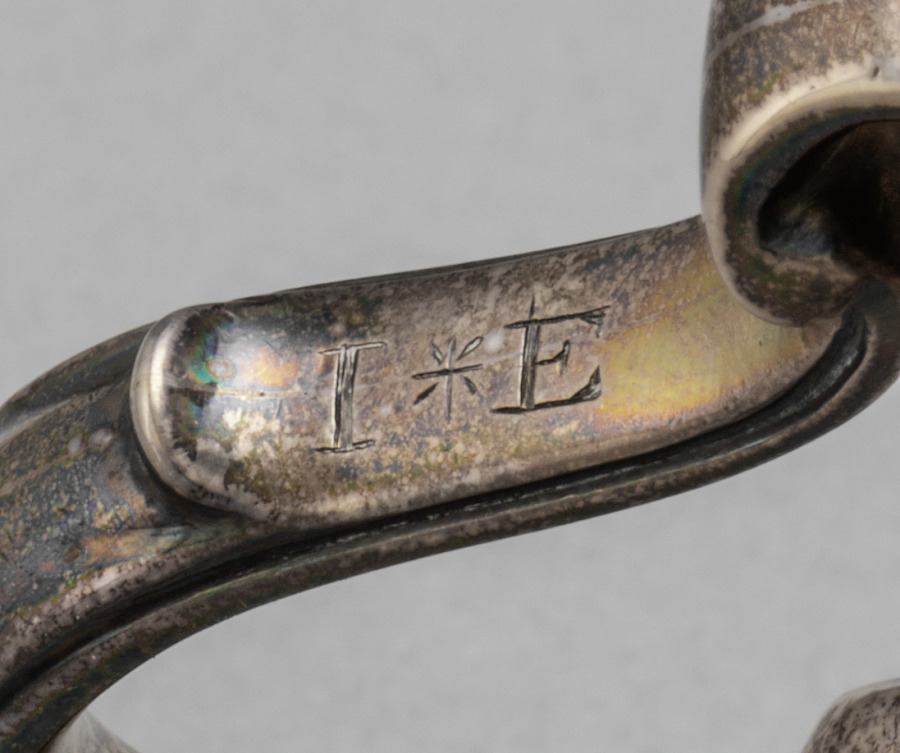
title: Gravy Boat (1 of 2)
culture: England, 18th century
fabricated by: Samuel Wood (British)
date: 1746–1747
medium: silver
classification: Silver